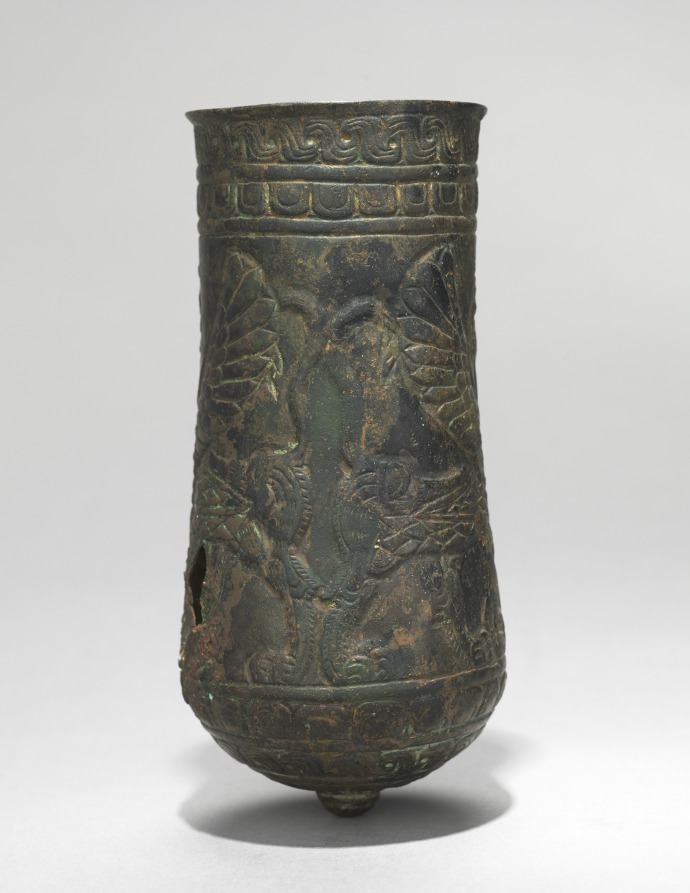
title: Button-Based Situla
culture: Iran, Luristan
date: 900–700 BCE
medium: bronze, repoussé, punched, incised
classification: Metalwork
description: The metalworkers of Luristan provided the Assyrian empire with elaborate bronze ornaments and vessels. These two situla are decorated symmetrically---one with ibexes drinking from an overflowing water jar; the other, with sphinxes.